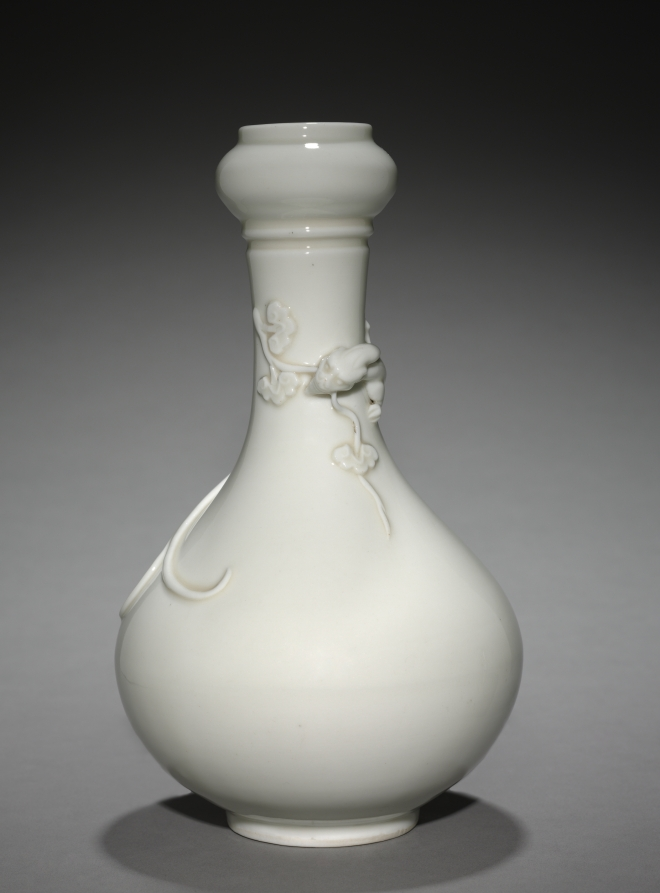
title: Bottle-shaped Vase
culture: China, Qing dynasty (1644-1911), Kangxi reign (1662-1722)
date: 1662–1722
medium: porcelain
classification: Ceramic